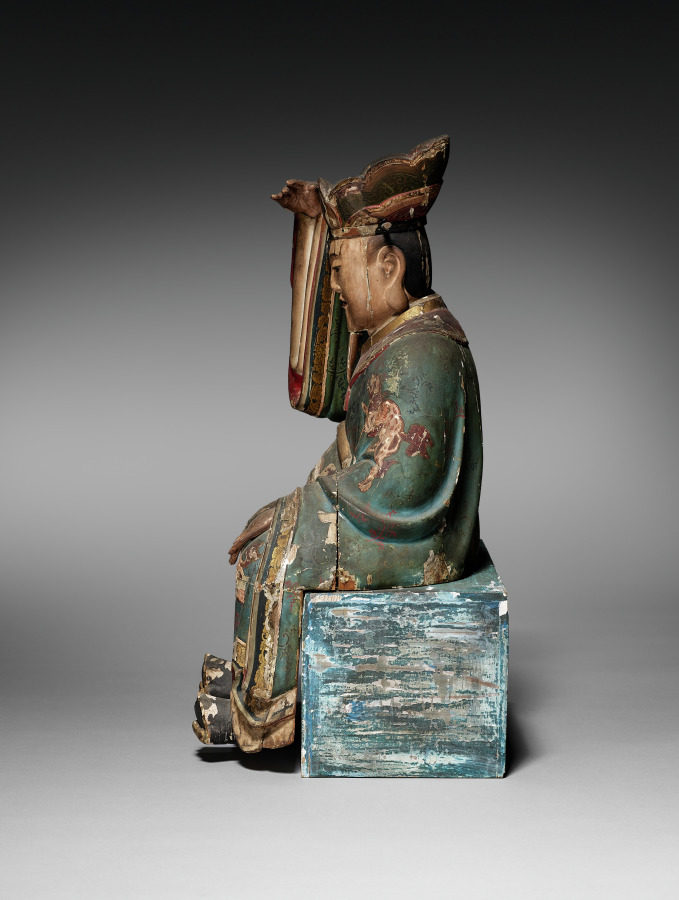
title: A King of Hell?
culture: Japan, Edo period (1615–1868)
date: c. 1800s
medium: wood, gesso, pigment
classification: Wood